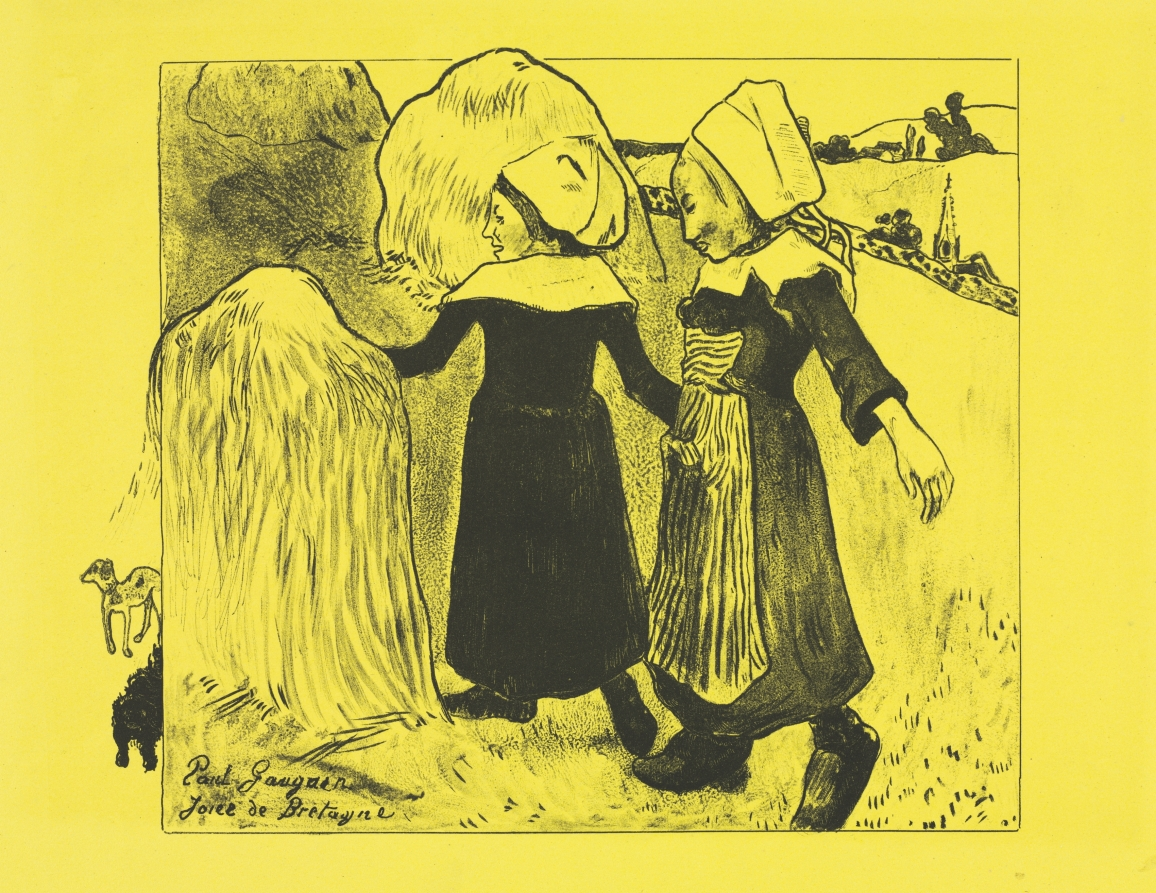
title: Volpini Suite: Joys of Brittany (Joies de Bretagne)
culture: France, 19th century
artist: Paul Gauguin (French, 1848–1903)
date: 1889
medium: zincograph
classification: Print